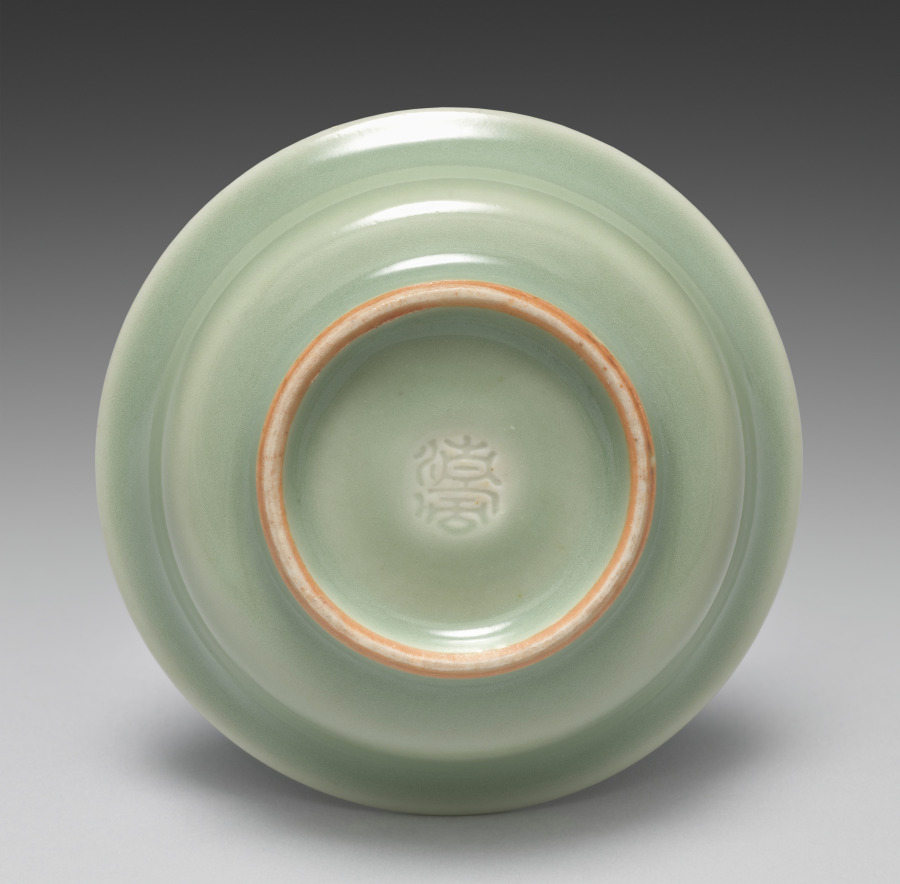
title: Saucer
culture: Japan, Meiji period (1868–1912)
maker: Seifū Yohei III (Japanese, 1851–1914)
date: 1893–1914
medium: One from a set of ten dishes; porcelain with green glaze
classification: Ceramic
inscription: 清風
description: Yohei III’s main output for his sophisticated clientele was in the form of tea sets and dining sets. He created a range of dishes in green glazes. He often produced in pairs, sets of five, or sets of ten. For this set of ten small dishes in a simple, round form that emphasizes the glaze above all, the box lid designates the piece as seiji, or green-glazed porcelain, using a general term for the extensive palette of green glazes often called celadon in English. The box lid further identifies the dishes themselves as tōchō, literally “bean-sized saucers,” a size that makes them suitable for dipping sauces.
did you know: The ten dishes in this set are stored in stacks of five in a two-compartment box.